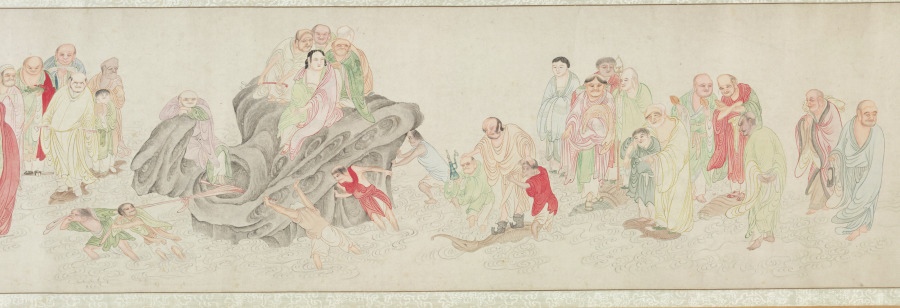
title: The Five Hundred Arhats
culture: China, Ming dynasty (1368–1644)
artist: Wu Bin (Chinese, active c. 1591–1626)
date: 1591–1626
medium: Handscroll; ink and color on paper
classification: Painting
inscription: 枝隱頭陀吳彬齋心拜寫 [印]吳彬之印; 文中父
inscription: 7 seals of Qianlong emperor (r. 1736–95): Gu xi tian zi 古希天子; Shou 壽; Qianlong jian shang 乾隆鑑賞; San xi tang jing jian xi 三希堂精鑑璽; Yi zi sun 宜子孫; Tai shang huang di zhi bao 太上皇帝之寳; Qian qing gong bao 乾清宮寶.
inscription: 6 seals of Cheng Qi 程琦 (1911–1988): Ke an geng zi wu shi yi hou suo de ming ji 可菴庚子五十以後所得名跡; 5 other Cheng Qi seals.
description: More than 66 feet long, this handscroll depicts 447 luohans, 72 attendants, and the bodhisattva of compassion at its very end. Luohans (arhats in Sanskrit), disciples of the Buddha and protectors of the Buddha’s law, possess supernatural powers and take on myriad external appearances. The amusing assortment of characters are engaged in an array of religious, secular, and miraculous activities. The painter used stylistic features borrowed from earlier artists, carefully controlled lines, and refined coloring. Wu Bin was a lay Buddhist and depicting this sort of image was part of a religious practice seeking understanding of the Buddha’s teaching.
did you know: Far advanced on the path to enlightenment, arhats have the capacity to tame tigers, free dragons, and to float on water or in the air.